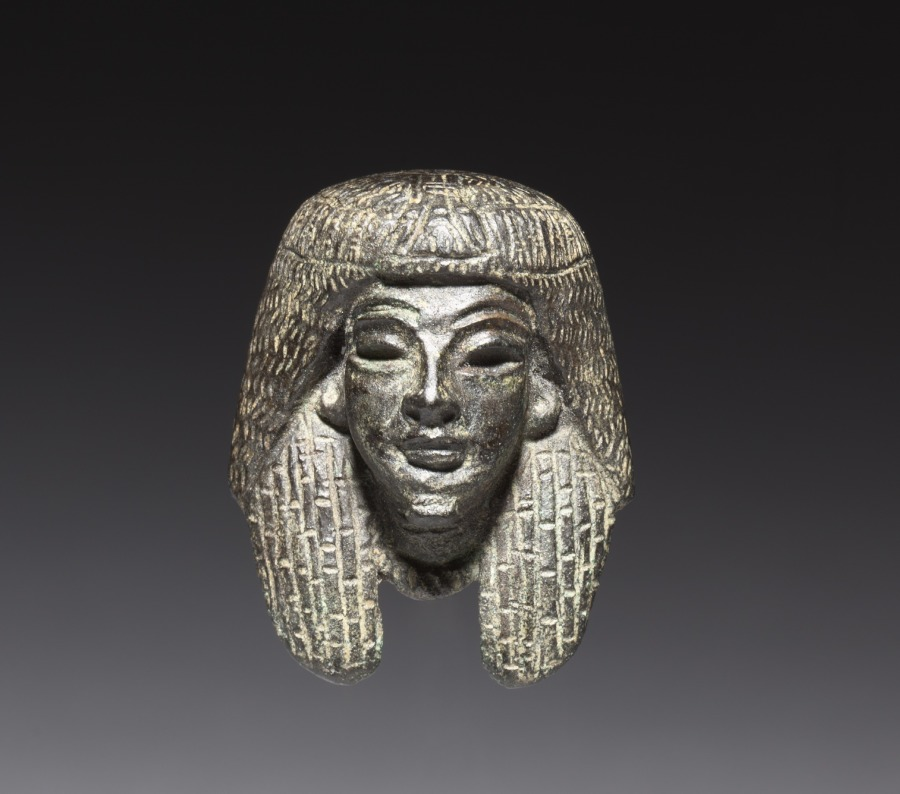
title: Bronze mounts from a "Shawabty Bundle"; Head and Crossed Arms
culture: Egypt, Thebes, Wadi Qubbanet el-Qirud, New Kingdom (1540–1069 BCE), Dynasties 18–19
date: c. 1336–1256 BCE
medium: head; bronze face, black copper wig, with traces of gilding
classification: Funerary Equipment